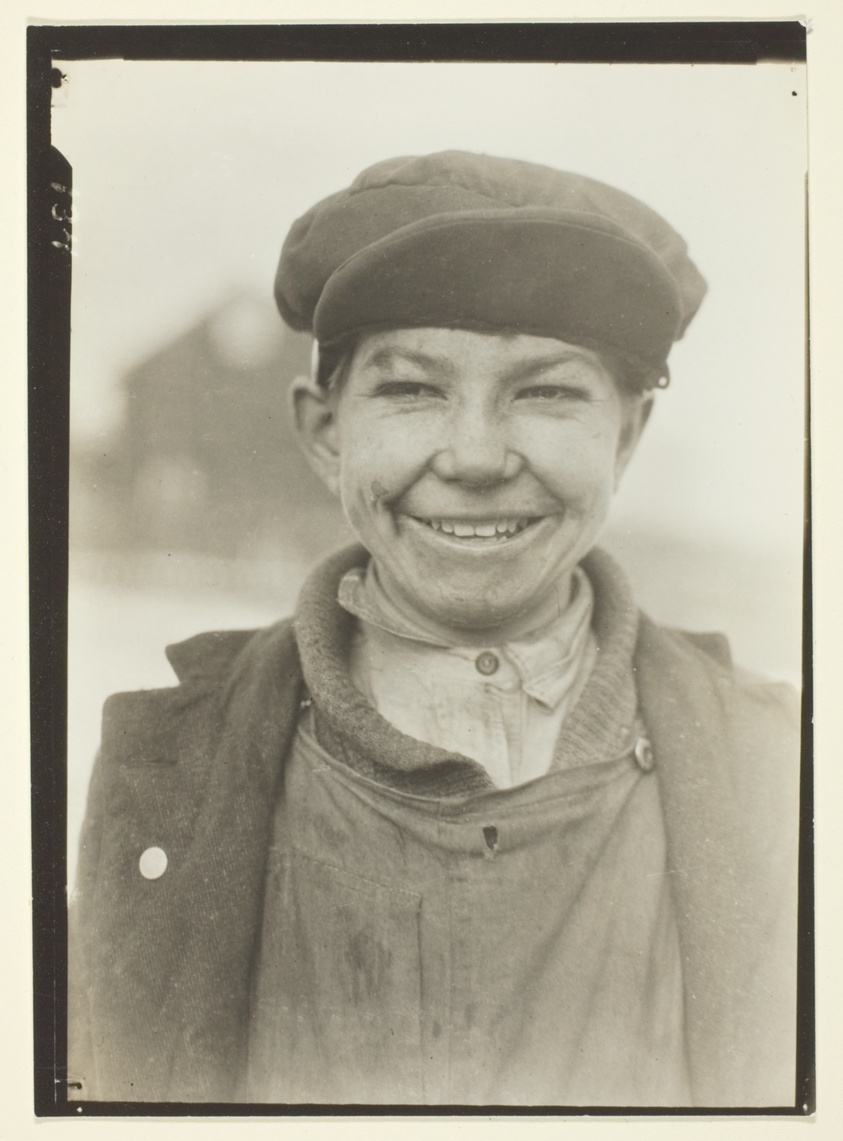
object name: Photograph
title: Coal Miner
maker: Lewis Wickes Hine (American, 1874–1940)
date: c. 1920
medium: Gelatin silver print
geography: United States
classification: gelatin silver (developing-out-paper) pr; photographic process; photography; photograph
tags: Collected by Hugh Edwards, documentary